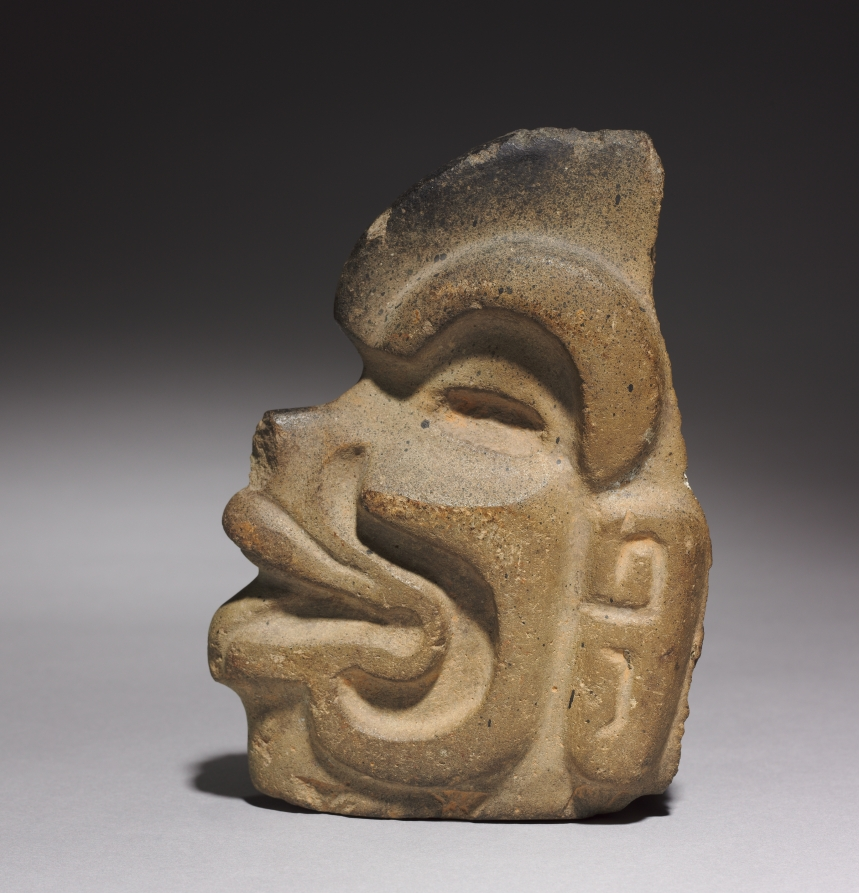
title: Head-Shaped Hacha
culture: Mexico, Isthmus of Tehuantepec(?), Coastal Lowlands style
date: 400–950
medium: stone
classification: Sculpture